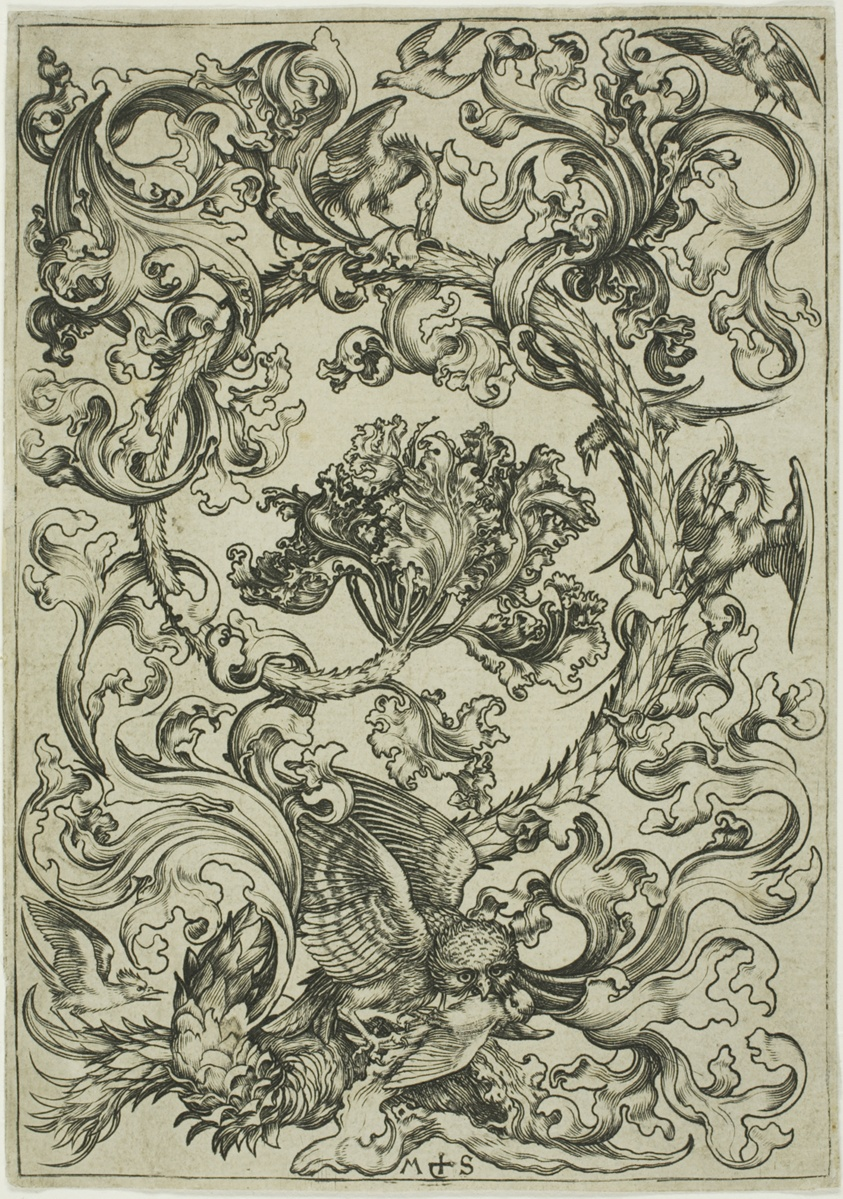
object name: Print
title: Ornament with Owl Mocked by Day Birds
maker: Martin Schongauer (German, c. 1430/50-1491)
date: c. 1474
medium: Engraving on buff laid paper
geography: Germany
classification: etching; print; prints and drawing